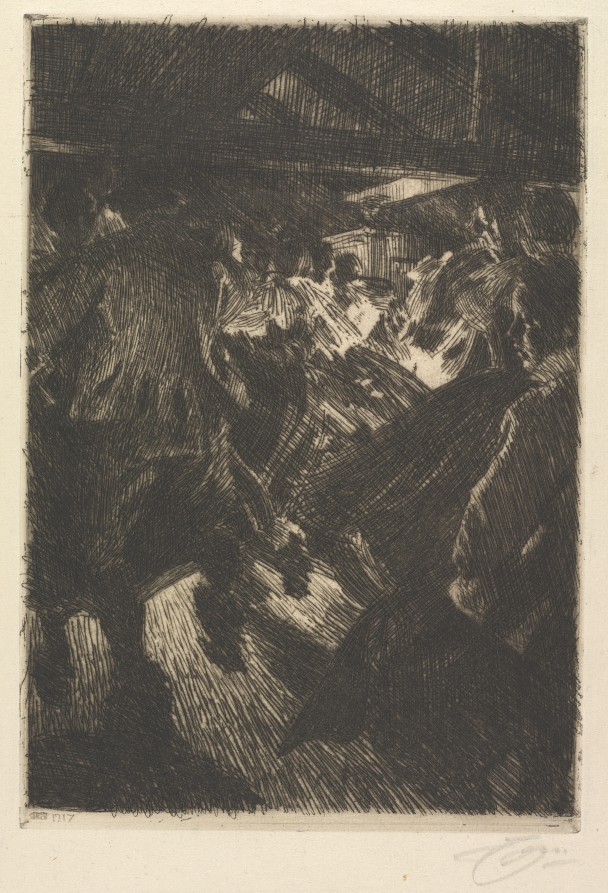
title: Gopsmor Cottage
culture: Sweden, 20th century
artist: Anders Zorn (Swedish, 1860–1920)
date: 1917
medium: etching and drypoint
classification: Print